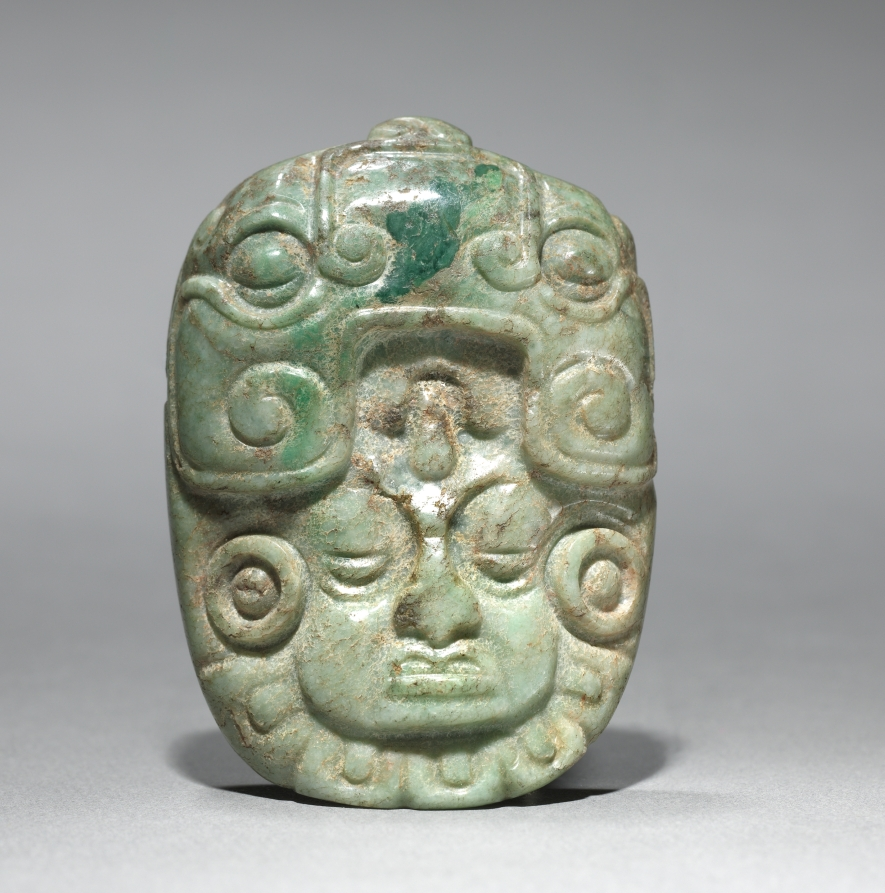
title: Ornament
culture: Mexico or Central America, Maya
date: 250–900 CE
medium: greenstone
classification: Jade